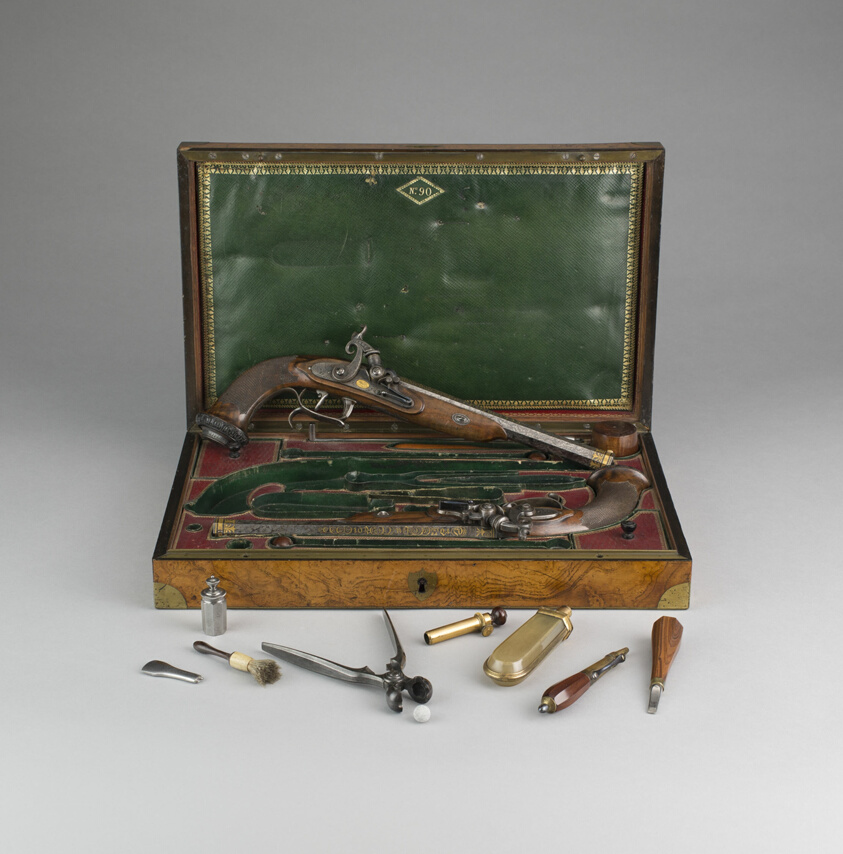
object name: Arms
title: Cased Pair of Percussion Pistols with Accessories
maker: Gunsmith: Jean Le Page (French, 1746-1834); Paris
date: 1814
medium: Steel, gold, silver, brass, lead, copper, walnut, rosewood, Hungarian ash, horn, and leather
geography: France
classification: firearm-handgun; arms; arms and armor